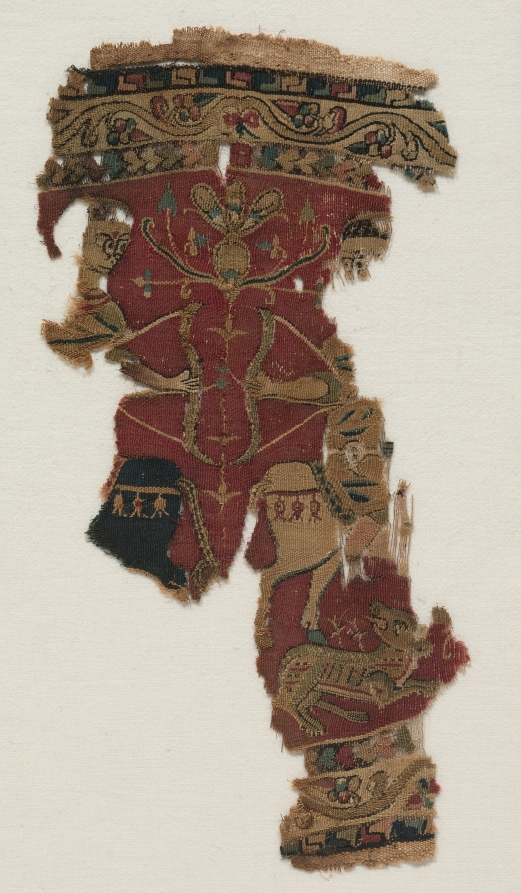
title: Hunters on Horseback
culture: Egypt, Islamic Abbasid period, late 8th to 9th century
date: late 700s–800s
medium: Plain weave and tapestry weave; undyed linen, dyed wool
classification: Textile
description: The Byzantine theme of the hunt is depicted with archers on horseback. They face each other because the design was based on costlier Byzantine silks with mirror-image symmetry.